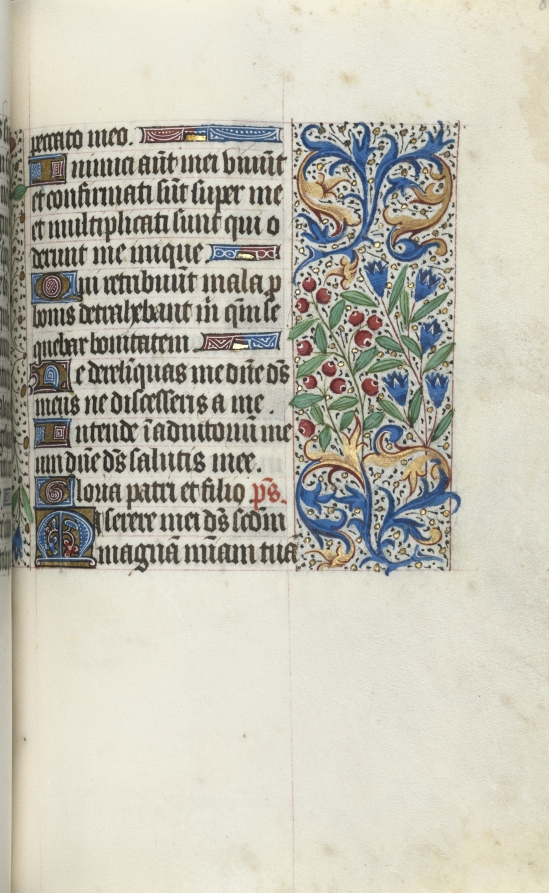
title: Book of Hours (Use of Rouen): fol. 85r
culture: France, Rouen, 15th century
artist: Master of the Geneva Latini (French, active Rouen, 1460–80)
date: c. 1470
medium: ink, tempera, and gold on vellum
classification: Bound Volume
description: In the late 1400s and early 1500s Rouen was an established and important center of book production. The city’s cathedral had a wealthy chapter that spent large sums of money to commission books and to maintain its extensive library. The stationers and booksellers would have likely been concentrated in or near the cathedral precinct. This artist, named after a manuscript now in Geneva, was Rouen’s principal illuminator during the second half of the 1400s.